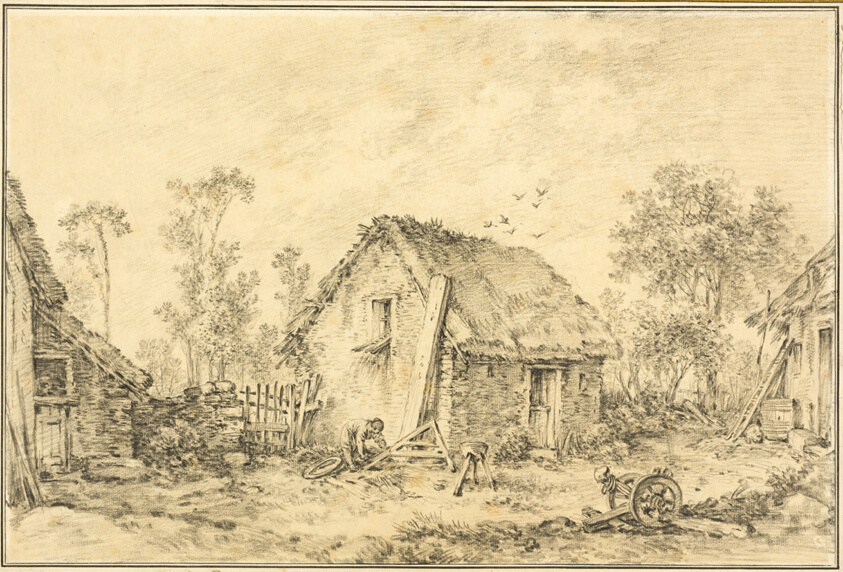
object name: Drawing and Watercolor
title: Landscape with Rustic Cottage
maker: François Boucher (French, 1703-1770)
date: c. 1760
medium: Black chalk on paper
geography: France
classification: chalk; drawings (visual works); prints and drawing